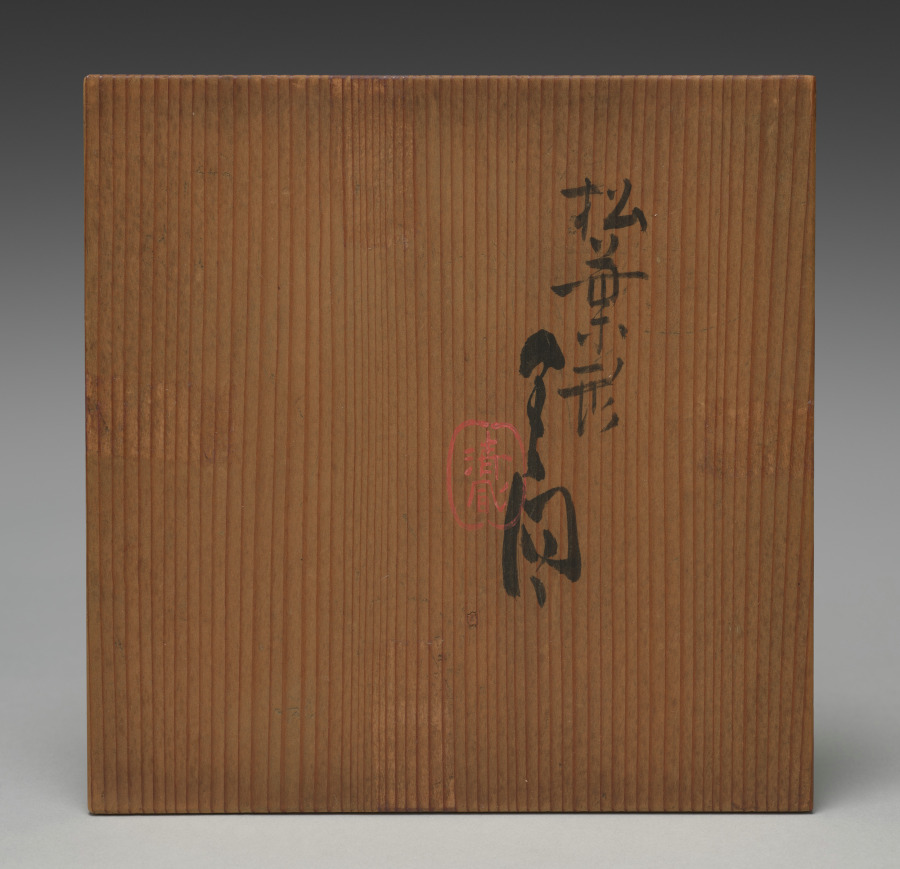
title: Pine-shaped Dish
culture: Japan, Meiji period (1868–1912)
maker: Seifū Yohei III (Japanese, 1851–1914)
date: 1893–1914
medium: Stoneware with underglaze iron oxide and crackled glaze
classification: Ceramic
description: The clever design on this stoneware Awata-style dish makes use of the interior and exterior surfaces to present a close-up view of pine needles on the branch painted in underglaze iron oxide. The branch is shown on the outside of one side of the dish, while the needles fan out across the inside. The entire dish, when seen from above, reveals a shape resembling the mushroom cap–like motif appearing in textile designs and in classical Japanese paintings called Yamato-e to represent pine trees.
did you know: Awata ware, named for the area of Kyoto where it was historically produced, is considered a subset of Kyoto ware. It is characterized by a very light brown body with a transparent crackled glaze.